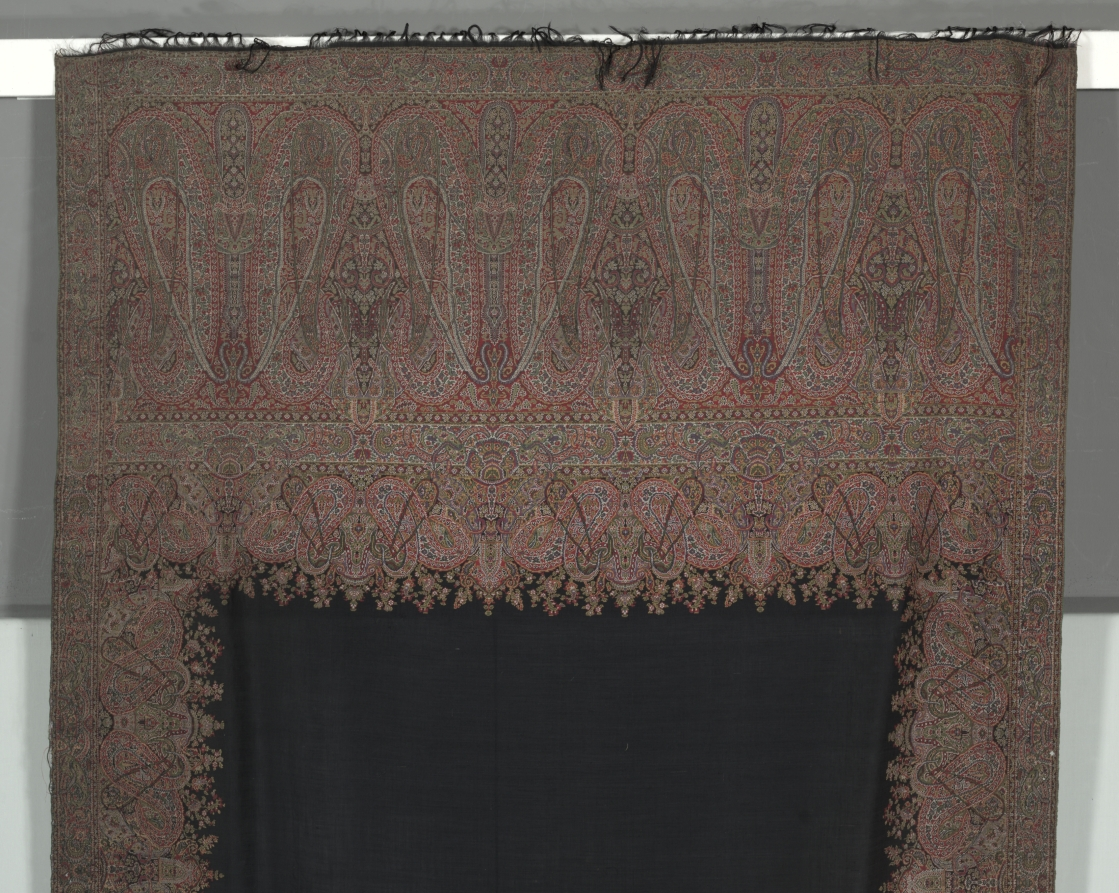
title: Long Shawl with Galleries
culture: France, Paris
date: 1830–35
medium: wool?; supplementary weft pattern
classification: Textile